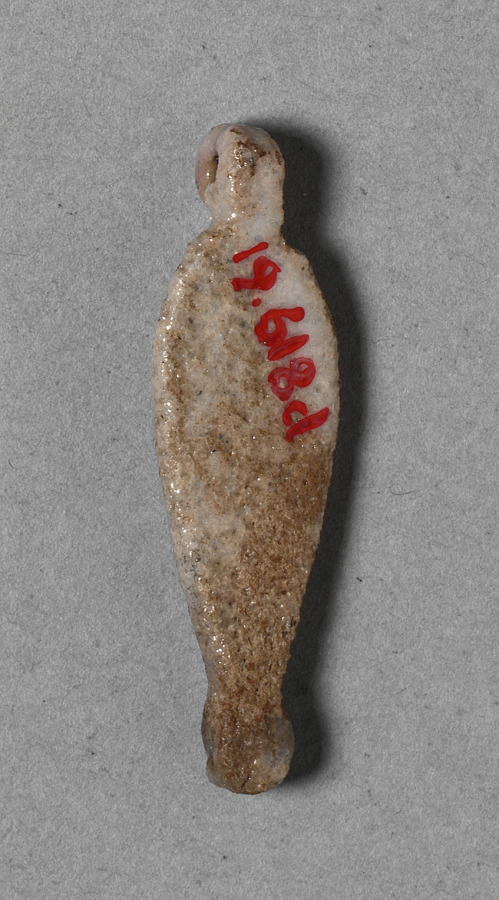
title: Petal-Shaped Bead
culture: Egypt, New Kingdom (1540–1069 BCE), Dynasty 18, reign of Amenhotep III (1390–1352 BCE)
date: c. 1391–1353 BCE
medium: faience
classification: Jewelry